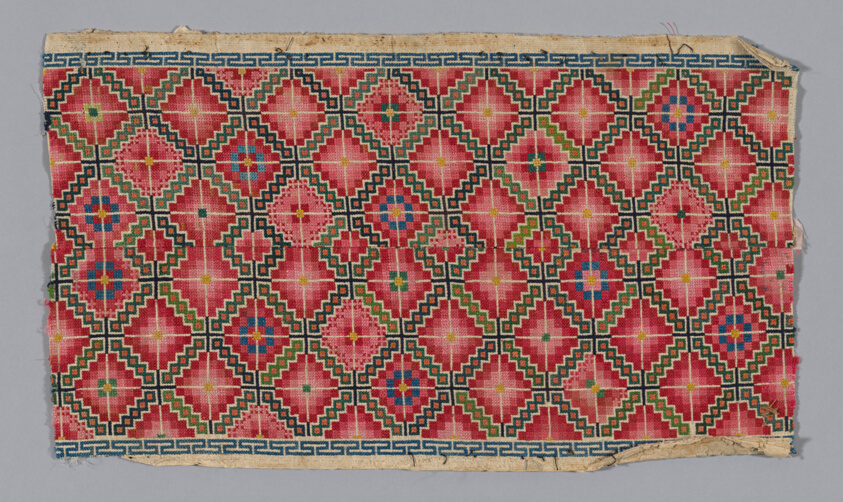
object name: Textile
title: Panel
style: qing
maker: Han-Chinese (China)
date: Qing dynasty (1644–1911), 1875/1900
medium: embroidered gauze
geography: China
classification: embroidery; textile